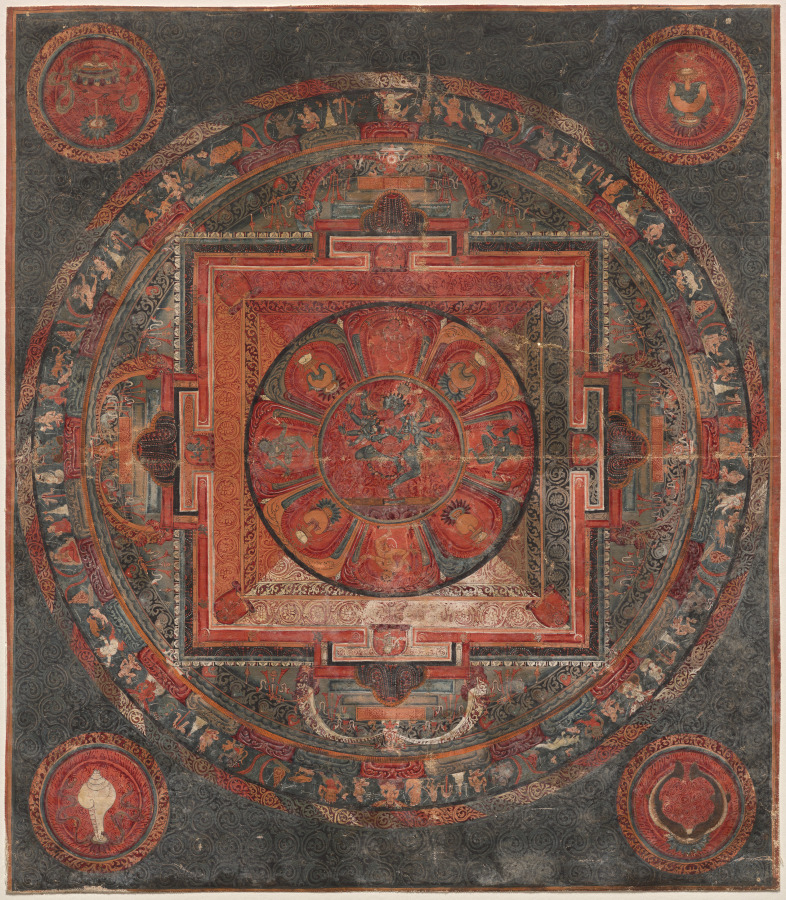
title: Mandala of Chakrasamvara and Vajravarahi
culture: Nepal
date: late 1400s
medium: Gum tempera on cloth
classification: Painting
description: A mandala is a two-dimensional diagram of a palace-like structure, viewed from above. This mandala depicts the abode of a 4-headed, 12-armed figure who personifies a major tantric Buddhist text, the Chakrasamvara-tantra. He dances in the bliss of sexual union with his consort, the red Vajravarahi, in the central circle, which is equivalent to the penthouse of their palace. Through guided meditation, practitioners can visualize entering through each of the four gates to experience the beauty of the enlightened realm. The outermost ring of cremation grounds indicates that one must overcome fear of death before reaching the realm of enlightenment.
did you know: In the corners are four auspicious symbols (clockwise from top left): umbrella (an emblem of royalty), pot (referencing abundance), pair of fish (symbol of productivity), and conch shell (indicating the eradication of obstacles).